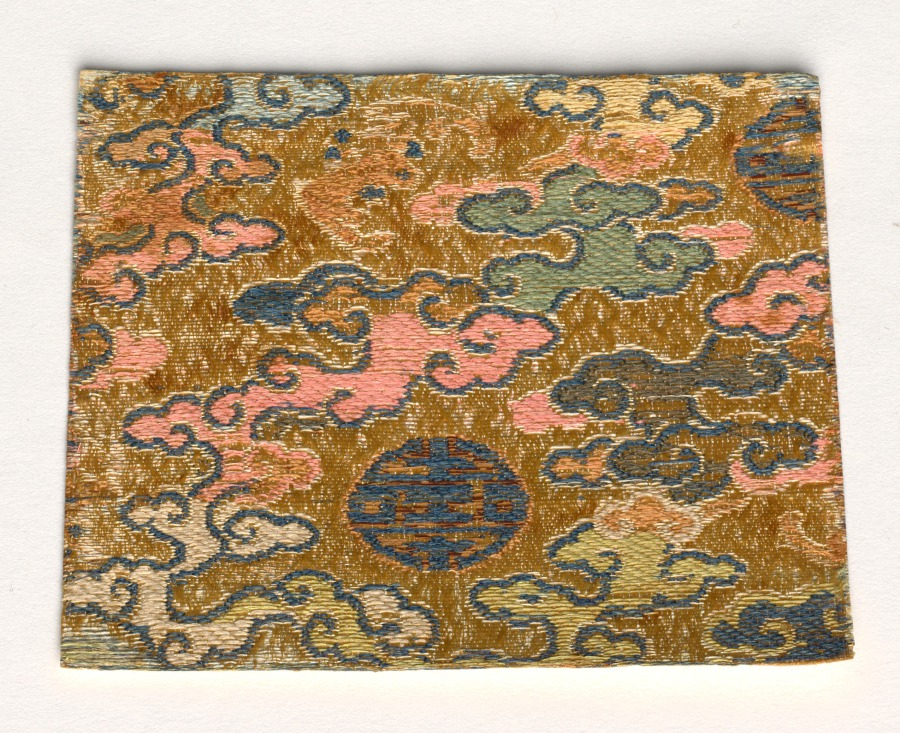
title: Fragment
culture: China, Qing dynasty (1644-1911)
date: 1700–1720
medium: Silk, diaper weave; satin ground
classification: Textile